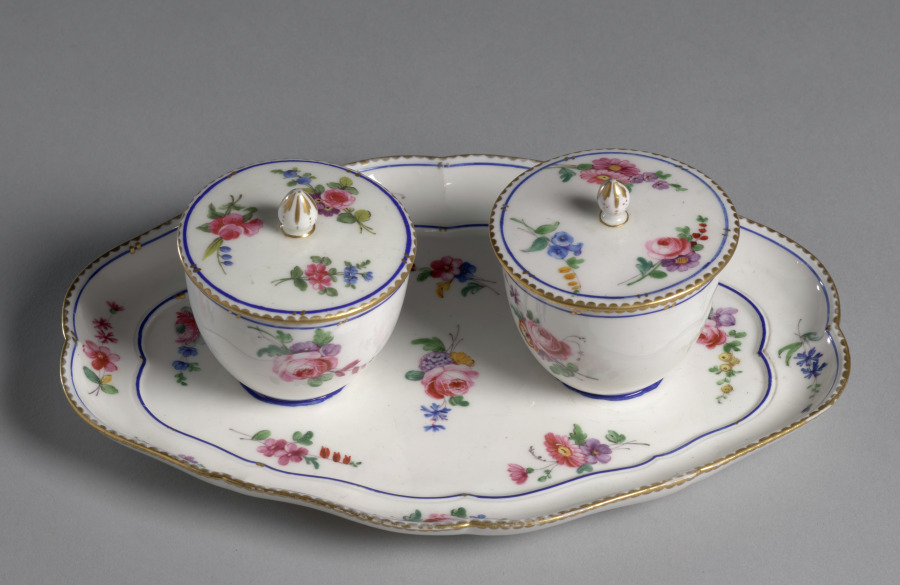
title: Jam Pots on Stand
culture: France, 18th century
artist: Sèvres Porcelain Factory (French, est. 1756)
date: c. 1760's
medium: porcelain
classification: Ceramic